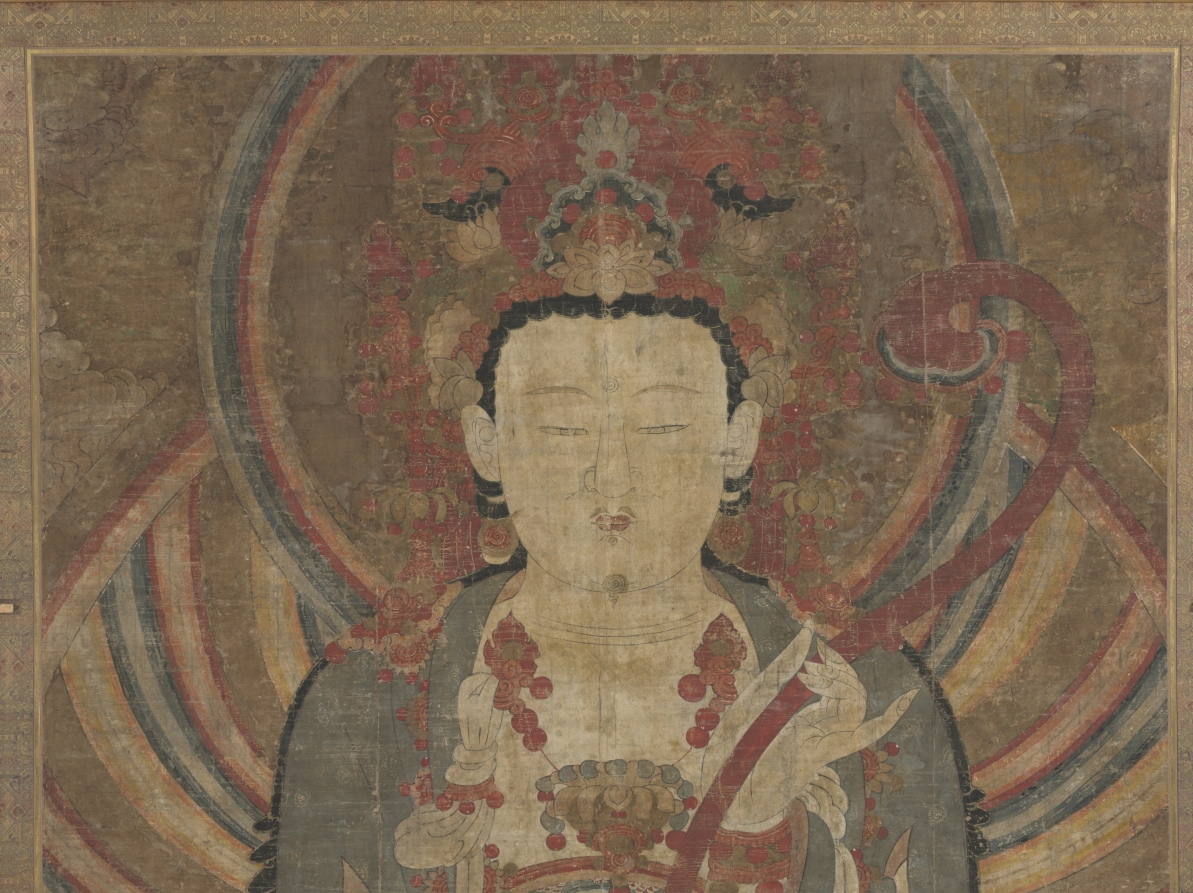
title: Seated Manjusri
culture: Korea, Joseon dynasty (1392–1910)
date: 1700s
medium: hanging scroll; ink and color on silk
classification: Painting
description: Large-size Buddhist paintings dated to the Joseon period (1392–1910) were once hung behind Buddhist statues, attached to the wall. In the Buddhist pantheon of the Joseon period, Bodhisattva Manjusri appears as a deity attendant to Vairocana Buddha.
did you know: Bodhisattva Manjusri is holding a ruyi scepter to represent ultimate wisdom.